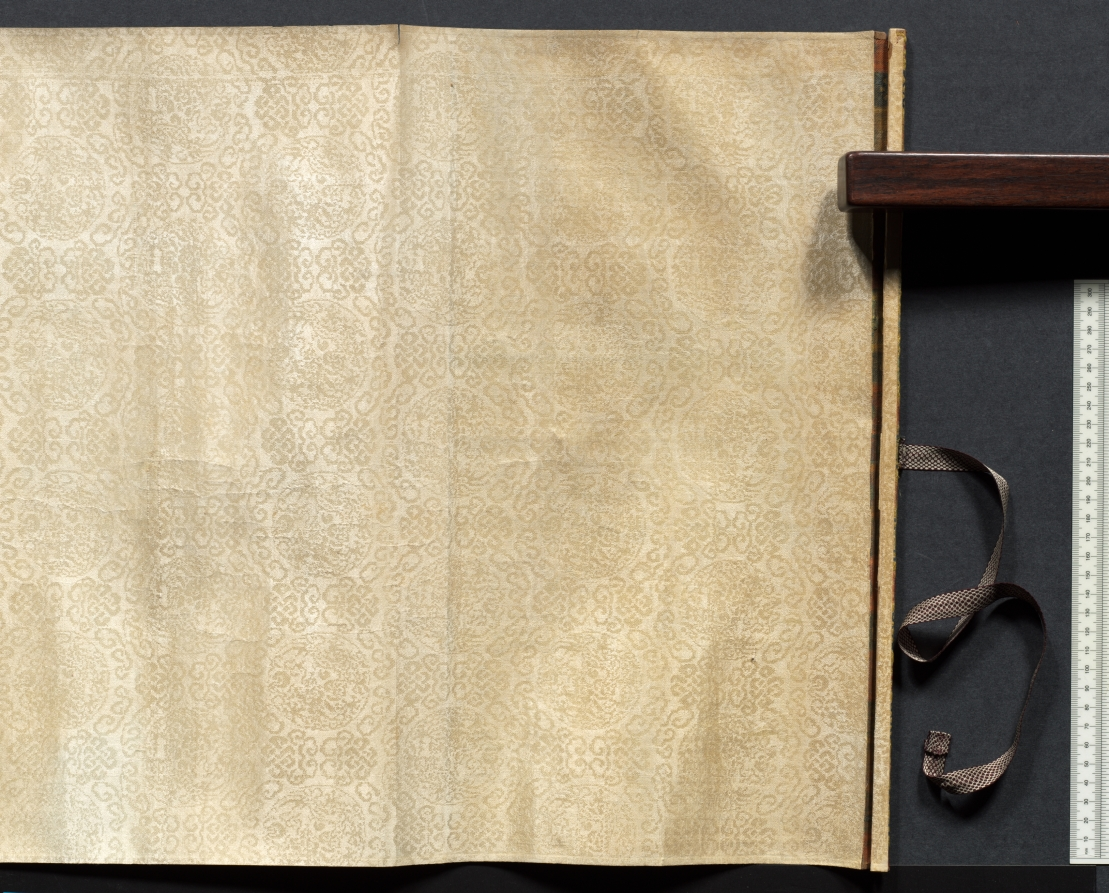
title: Palace Ladies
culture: China, Qing dynasty (1644-1911)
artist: copy after Qiu Ying (Chinese, 1494–1552)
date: 1644–1911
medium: handscroll, ink and color on silk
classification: Painting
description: This handscroll illustrates the pursuits of court ladies in a palace precinct on a spring day. Women, young girls, and their maids amuse themselves by sitting on a swing, playing games, watering and admiring peonies, performing music together, playing the qin (zither), feeding a parrot on the balustrade and fish in the water, or catching butterflies. The life of elite women was mostly restricted to the so-called inner quarters, meaning the garden and inner courts of the house. This painting idealizes the world of young palace girls that in fact was often filled with boredom and waiting for a lover.